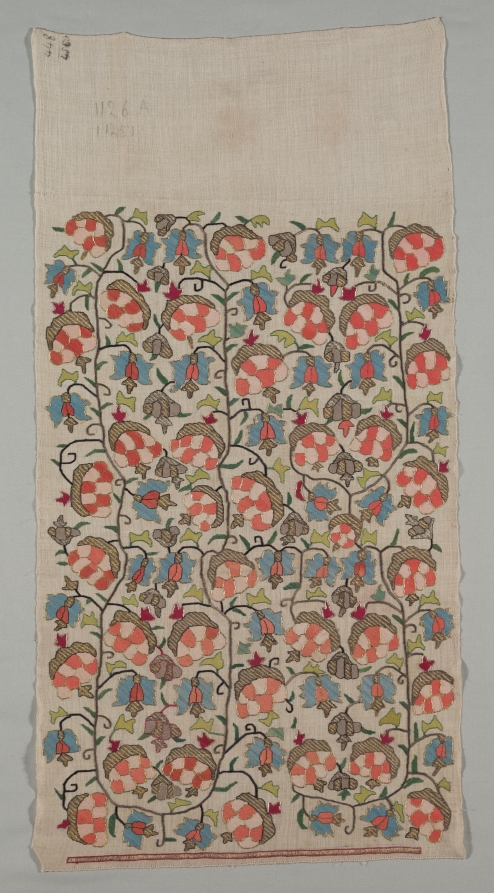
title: Embroidered Cover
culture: Turkey, 19th century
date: 19th century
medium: embroidery: silk and gold filé on linen tabby ground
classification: Embroidery